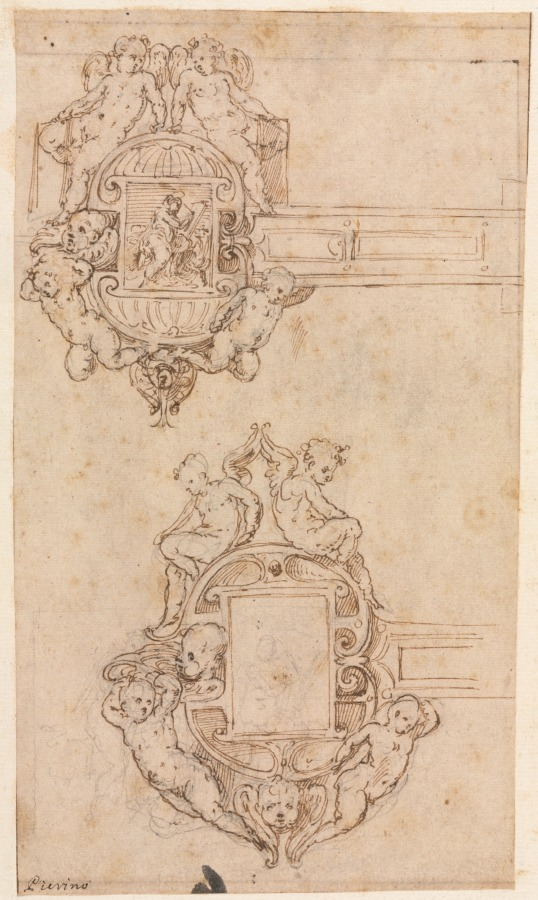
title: Design for Decorative Hinges (recto) Border Lines (verso)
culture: Italy, 16th century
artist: Luzio Romano (Italian, active 1528–75)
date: mid 1500s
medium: pen and brown ink over black chalk; framing lines in brown ink (lower left, upper right)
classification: Drawing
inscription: ower left, in brown ink: Pierino ; RECTO OF SECONDARY SUPPORT, upper right, in brown ink: 128 ; upper right, in black chalk(?): 32 ; center right, in graphite: 28 [underlined, sideways] ; lower right, in graphite: cx[l?] ; VERSO OF SECONDARY SUPPORT, lower right, in graphite: A 309[7?] . ; FRAGMENT OF OLD MAT (now removed), across top, in graphite: Pierino del Vaga (circle of) Door Hinges ; across center, in graphite: Enlarged duplicate of / drawing at Windsor Castle / A. N. [underlined] ; lower right, in graphite: 159